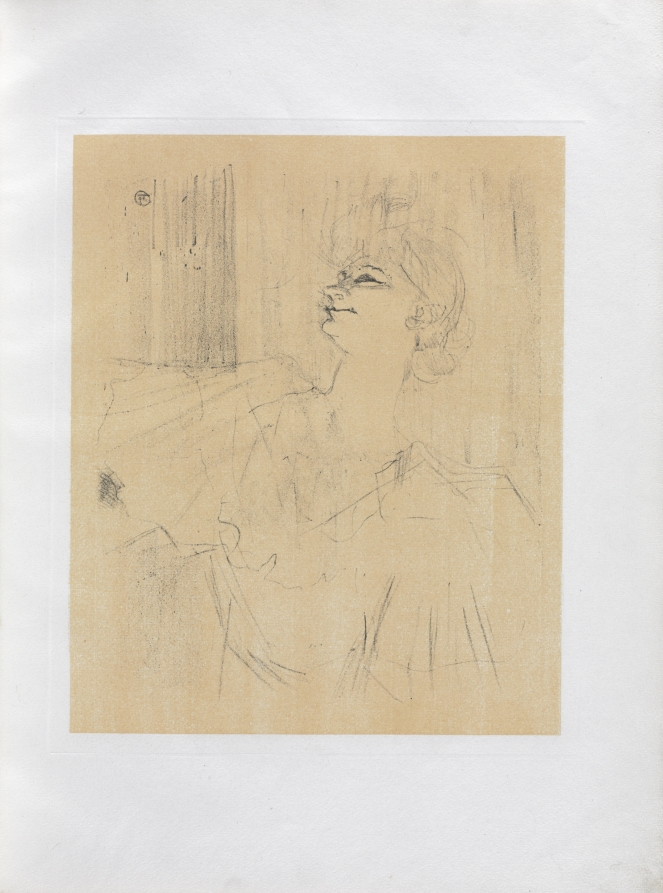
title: Yvette Guilbert-English Series: Menilmontant de Bruant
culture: France, 19th century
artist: Henri de Toulouse-Lautrec (French, 1864–1901)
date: 1898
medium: lithograph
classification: Bound Volume